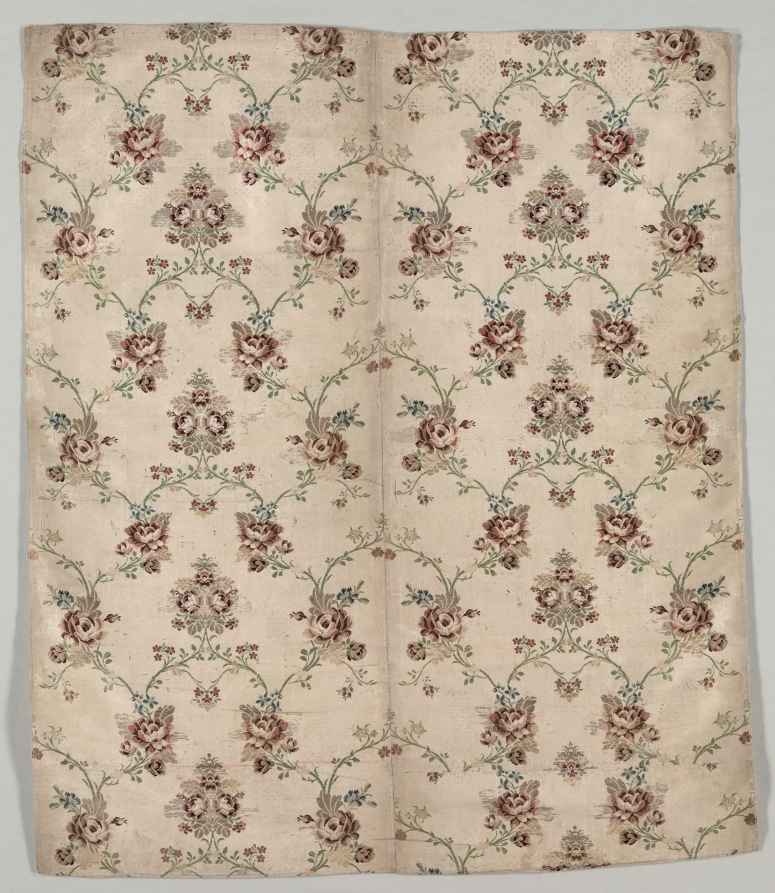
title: Fragment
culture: France, mid-18th century, Period of Louis XV (1723-1774)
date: mid 1700s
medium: brocade on tabby; silk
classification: Textile